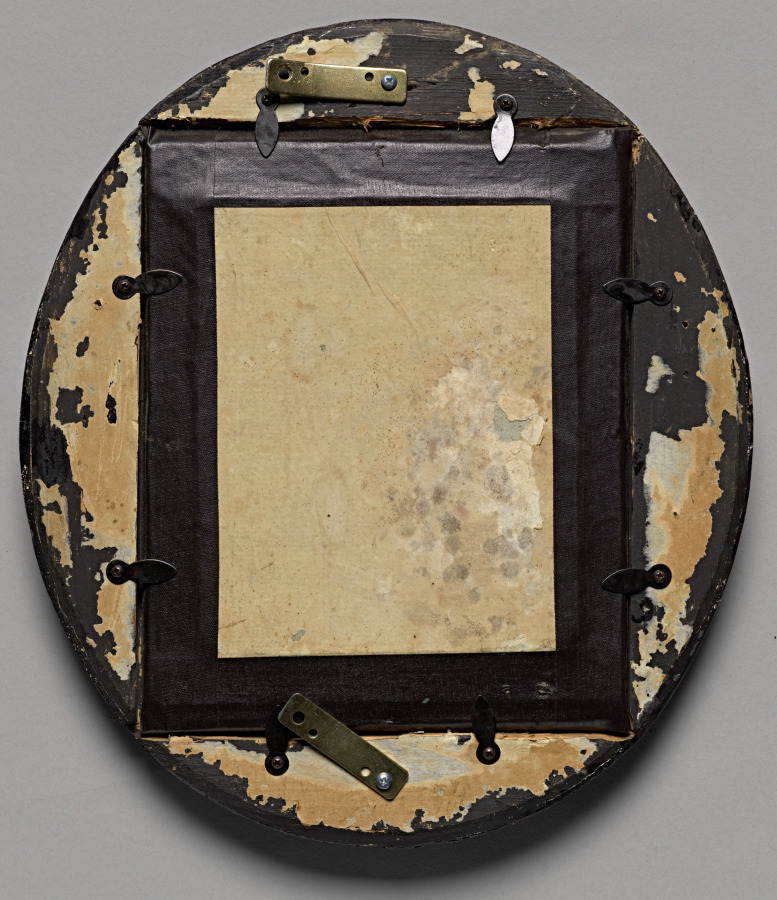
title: Priest, France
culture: France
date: c. 1840s–50s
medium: daguerreotype, half-plate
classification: Photograph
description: The daguerreotype was the first publicly available photographicprocess.Itwasinusefrom1839into the 1850s and especially favored for portraits. The daguerreotype’s mirrorlike surface offered incredible clarity and detail but the process only produced a unique image. It did not allow multiple copies to be produced.